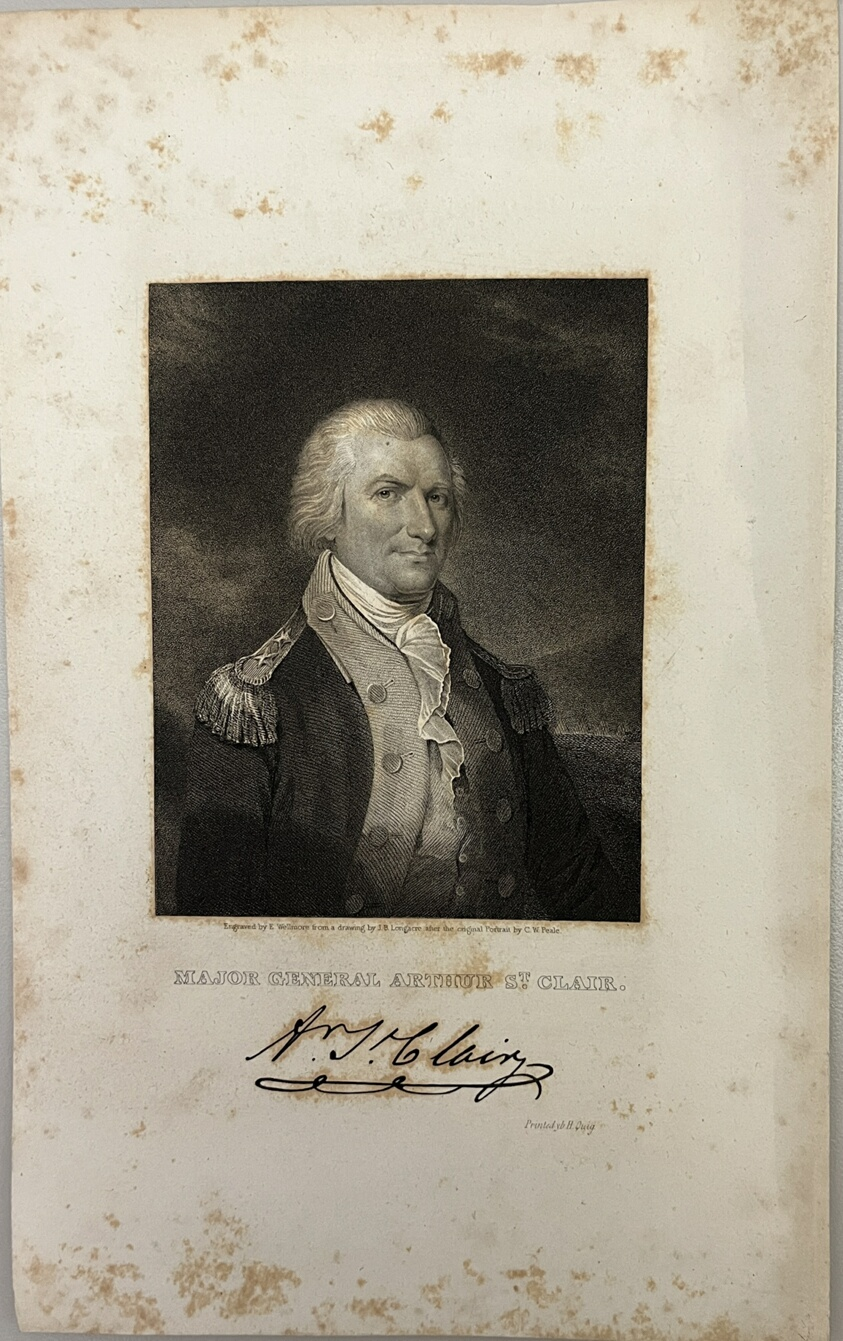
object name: Print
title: Major General Arthur St. Clair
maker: Edward Wellmore (American, active mid-19th century); after James Barton Longacre (American, 1794-1869); after Charles Wilson Peale (American, 1741-1827)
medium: Stipple engraving on paper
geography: United States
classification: reproduction; print; prints and drawing